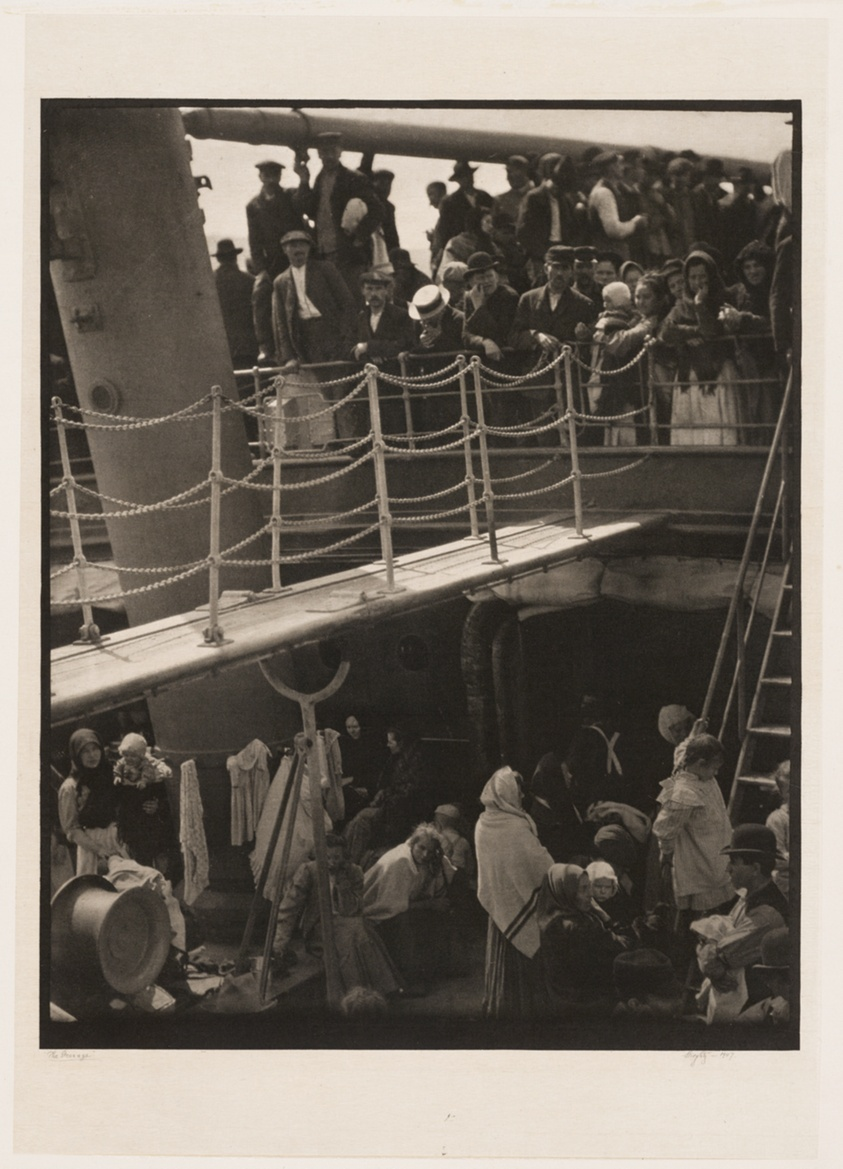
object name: Photograph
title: The Steerage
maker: Alfred Stieglitz (American, 1864–1946)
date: 1907, printed 1915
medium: Photogravure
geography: United States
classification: photogravure; photomechanical process; photography; photograph